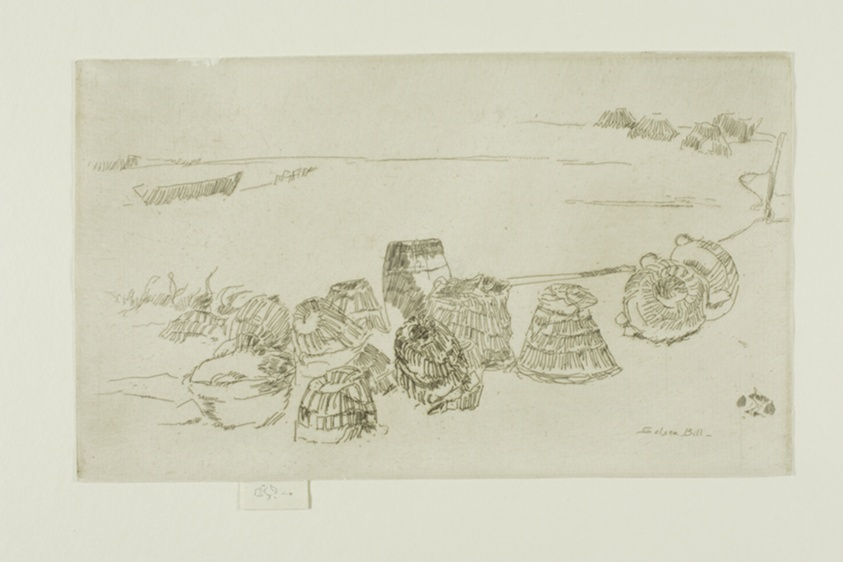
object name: Print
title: Lobster Pots - Selsea Bill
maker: James McNeill Whistler (American, 1834-1903)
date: 1880/81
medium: Etching and drypoint with foul biting in dark brown ink on ivory laid paper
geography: United States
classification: etching; foul biting; print; prints and drawing; paper; drypoint